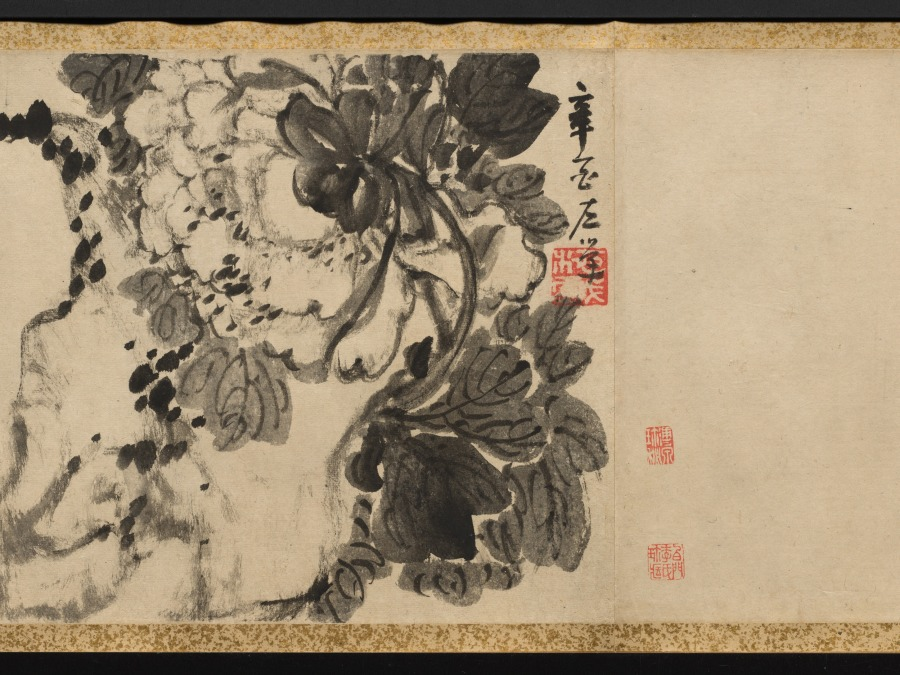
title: Plum Blossoms and Peonies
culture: China, Qing dynasty (1644-1911)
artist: Gao Fenghan (Chinese, 1683–1749)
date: 1741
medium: handscroll, ink on paper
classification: Painting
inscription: Artist's 2 inscriptions and 9 seals (the painting of Peonies with the artist's colophon and the colophon by Hou Chia-fan are on a single sheet of paper). Artist's inscription and 2 seals (Plum Blossoms): [seal] Ts'ai-yün. After finishing writing my colophon, I unrolled the painting to take another look, and it now seems that the composition here should have moved to the later part of the scroll. If that is the case, then the "Cool Beauty" [prunus] of the Solitary Hill is after all unable to take precedence over the "King of Flowers" [peony]. A laugh. Lao-fou inscribed. [seal] Feng-han. Artist's colophon (Plum Blossoms): [3 seals] Tun; Yen-yün-kung-yang, Hou-shang-tso-sheng. A few days after I painted this scroll for Shui- hsien [Yüeh Meng-yüan], the plum blossoms were in full bloom at his residence. He invited me over to enjoy them together for a long while, and I composed two additional poems and wrote them down here for his criticism. [Poems on the colophon are not translated.] First month, twenty-first day, your junior, Kao Feng-han of Nan-fou drafted this with the left hand. [seal] Feng-han. Artist's inscription and 4 seals (Peonies): Brushed with the left hand in the hsin-yu year [1741]. [seal] Yu-hsi. [3 seals at end of painting] Hou-shang-tso-sheng; Yen-yün-kung-yang; Shih-tsao-wu. Artist's colophon and seal (Peonies): The imperial concubine from the Yang family loved to dress in red, And from the emperor won the title of Hai-t'ang. But ever since she became the new dream of the moon palace, She changed into rainbow colors, while learning to dance. After I wrote the poem on Looking for Plum Blossoms in the Teng-wei Mountains, I attached to it a few branches of prunus, some bamboo tips and a piece of rock, with a scattering of green [moss] here and there to fill up the scroll. Unexpectedly, my playful fascination [with these subjects] was still not quite satisfied, so I made up these amorous ideas and romantic images [of the peony], to follow the footsteps of the fair lady of the Ku-hsieh Mountain [prunus]. Furthermore, I picked out one poem to be my vanguard. Perhaps such luminosity of wealth and power will be enough to overwhelm the poor fellows, and [they] will not mind the comparatively short length [of paper] assigned to it. Amusingly inscribed. Please correct me again. To Shui-hsien, my learned senior, your junior Han inscribed again. [seal] Tso-hua [left-handed painting]. 1 additional colophon and 5 additional seals: 1 colophon, dated 1742, and 3 seals of Hou Chia-fan (act. ca. 1742); 1 seal of P'u Ch'üan (20th c.?); 1 seal of Li family (dates unknown).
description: One of the so-called Yangzhou Eccentrics (a group of painters who lived in Yangzhou and were known for their unorthodox art and lifestyle), Gao Fenghan depicts China’s two most loved flowers in full bloom—the “cold beauty,” or plum blossom, in the first section, and the “king of flowers,” or peony, in the second section. Painted in 1741, the year when Gao decided to leave the south and return home to Shandong province in eastern China, this work was likely a token of farewell. His casual brushwork may indicate his mental and physical struggle at the time. After having crippled his right hand in 1737, Gao used his left hand to paint and achieved a crudeness and eccentric style unattainable before.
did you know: In East Asian art, peonies traditionally symbolize prosperity and wealth.